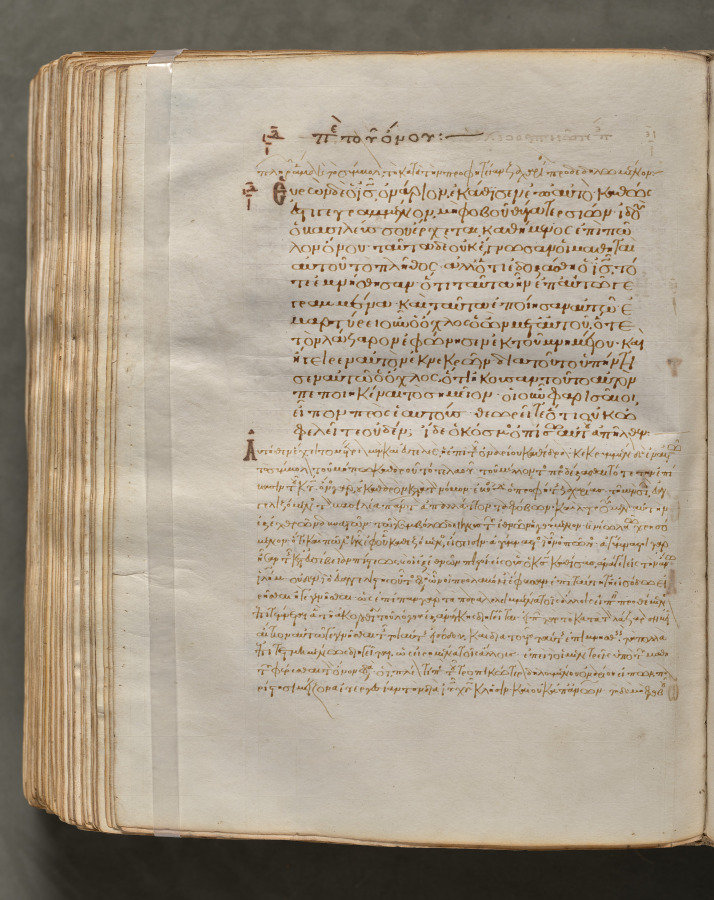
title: Text, folio 383 (verso), from a Gospel Book with Commentaries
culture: Byzantium, Constantinople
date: c. 1000–1100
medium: ink, tempera, and gold on vellum; leather binding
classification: Bound Volume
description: Each of the four gospels in this book opens on a page with brilliantly illuminated borders depicting the author of the text as well as birds—principally peacocks, symbols of the immortality of the soul—and fountains, representing the fountain of life and the salvation of the soul. This volume consists of 428 leaves with texts in Greek. Its level of sophistication suggests that it was probably written and decorated in a monastery in Constantinople.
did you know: Gospel books were carried in procession through Byzantine churches.